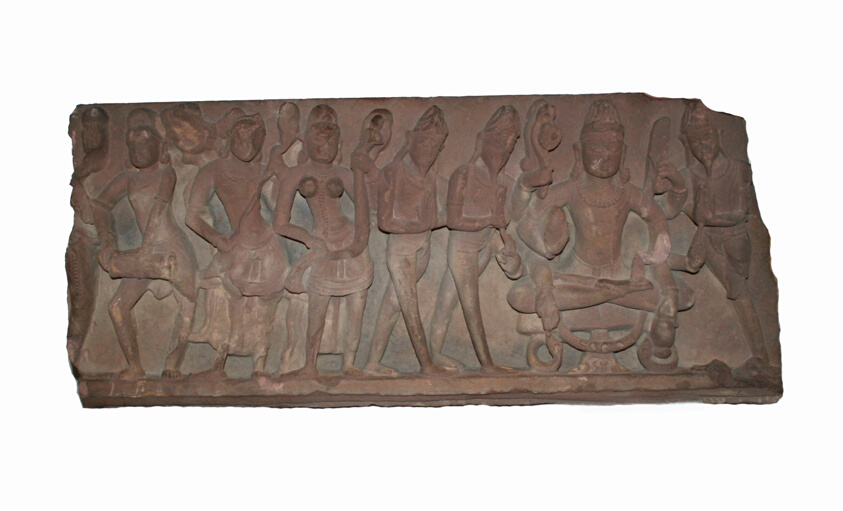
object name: Sculpture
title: Fragment of a Temple Doorway Lintel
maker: India; Possibly Madhya Pradesh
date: Chandella period, c. 11th century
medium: Red sandstone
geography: Uttar Pradesh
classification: stone; architectural fragment; asian art; sculpture